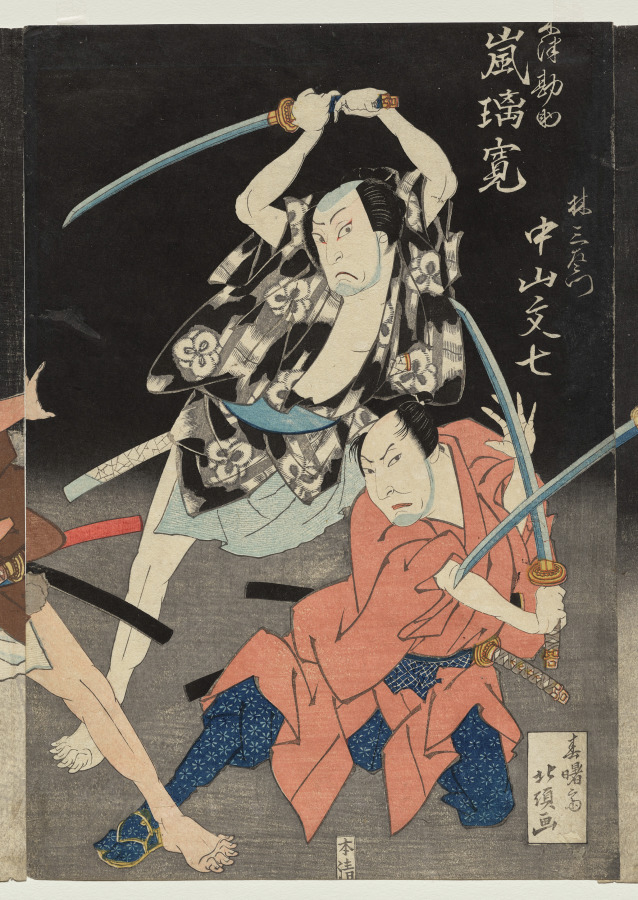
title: Arashi Rikan II as Kizu Kansuke and Nakayama Bunshichi III as Hayashi Sanzemon from the Kabuki Play "Eight Views of the Kizu River by Boating Song"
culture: Japan, Edo period (1615–1868)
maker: Shunshosai Hokuchō (Japanese, active 1822–1830)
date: 1829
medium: Center print from a triptych of color woodblock prints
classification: Print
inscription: Signature: Shunshosai Hokucho ga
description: Three prints form a continuous scene from a Kabuki play written in 1778 by Namiki Gohei I (1747–1808) and produced at the Kado Theater in Osaka in the summer of 1829. It was the final performance for actor Ichikawa Ebijūrō II (1806–1829; right)—highly regarded for portraying villains—because he got sick and died several months later. This design belongs to a category of Japanese prints called “actor images” (yakusha-e or 役者絵). They were collected by fans of popular Kabuki actors. Kabuki is a kind of entertainment that got its start in the early Edo period, evolving from dance performances with simple storylines to long plays with complex plots, elaborate sets, and full musical accompaniments. Performers wear showy costumes and heavy makeup and strike poses called mie at critical moments in the narrative. Dialogue is spoken in a stylized way that resembles singing.